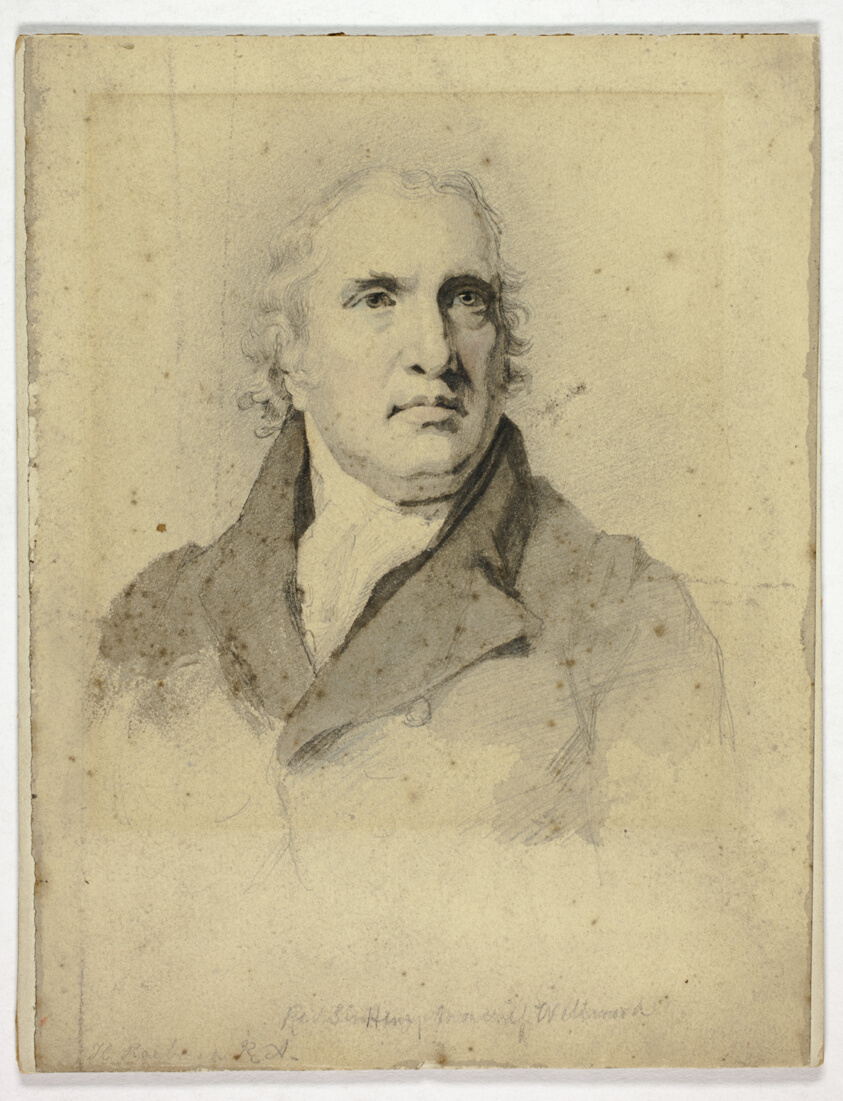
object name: Drawing and Watercolor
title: Rev. Henry Moncrief Wellwood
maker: Attributed to Sir Henry Raeburn (Scottish, 1756-1823); or possibly after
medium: Graphite with brush and gray wash and watercolor, on cream wove paper, laid down on board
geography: Scotland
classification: ink or chalk wash; drawings (visual works); prints and drawing